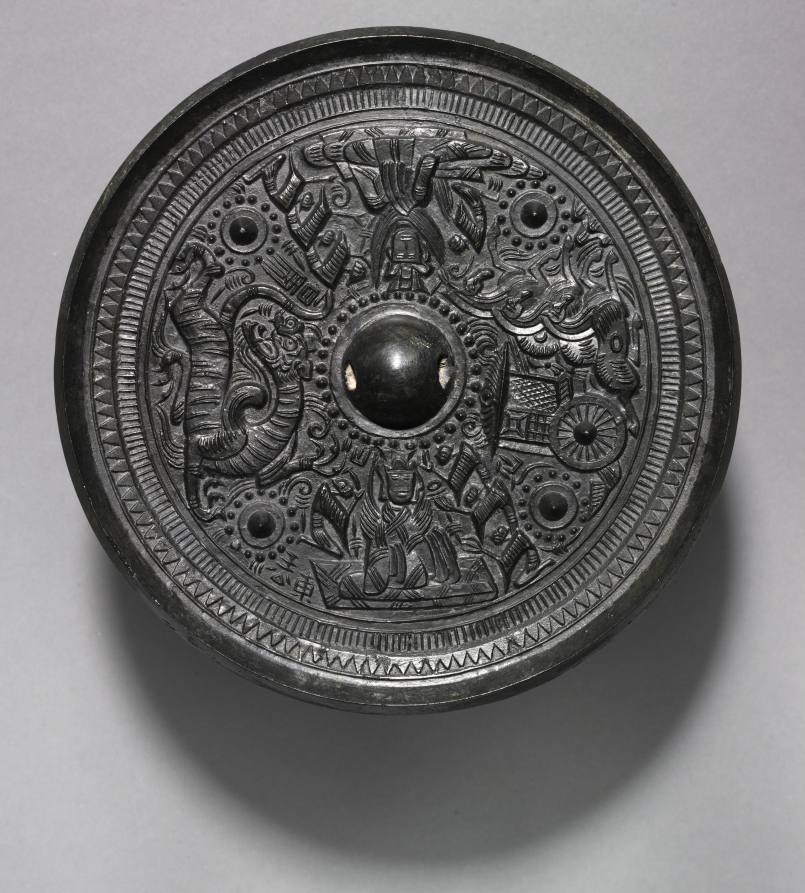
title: Mirror with Deities, Chariot, and the White Tiger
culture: China, Eastern Han dynasty (25–220 CE)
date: 100–200 CE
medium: bronze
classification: Metalwork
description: Depicted on the mirror back are two Daoist deities: the King Father of the East (Dongwanggong) and the Queen Mother of the West (Xiwangmu). Completing the design are the White Tiger of the west (one the Four Spirits representing the four cardinal directions, including the Green Dragon of the east, the Red Bird of the south, and the Dark Warrior of the north) and a chariot drawn by three horses. The reason for the redundancy of two symbolic images relating to the west is not known.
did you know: The meaning of the complex imagery on this mirror's back is not fully understood.